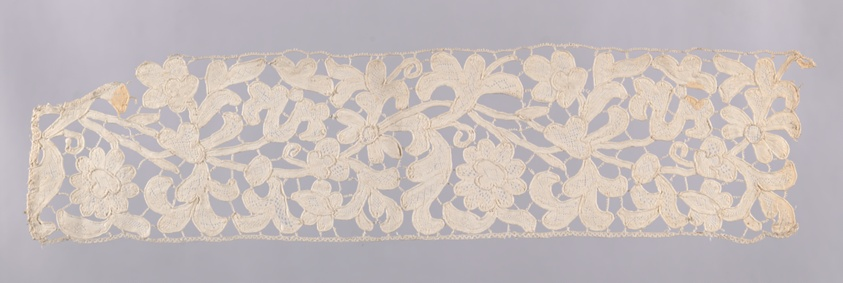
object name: Textile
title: Border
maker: Northern Europe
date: 1701/25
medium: Linen, needle lace on woven tapes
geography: Northern Europe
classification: textile; lace - mixed; lace